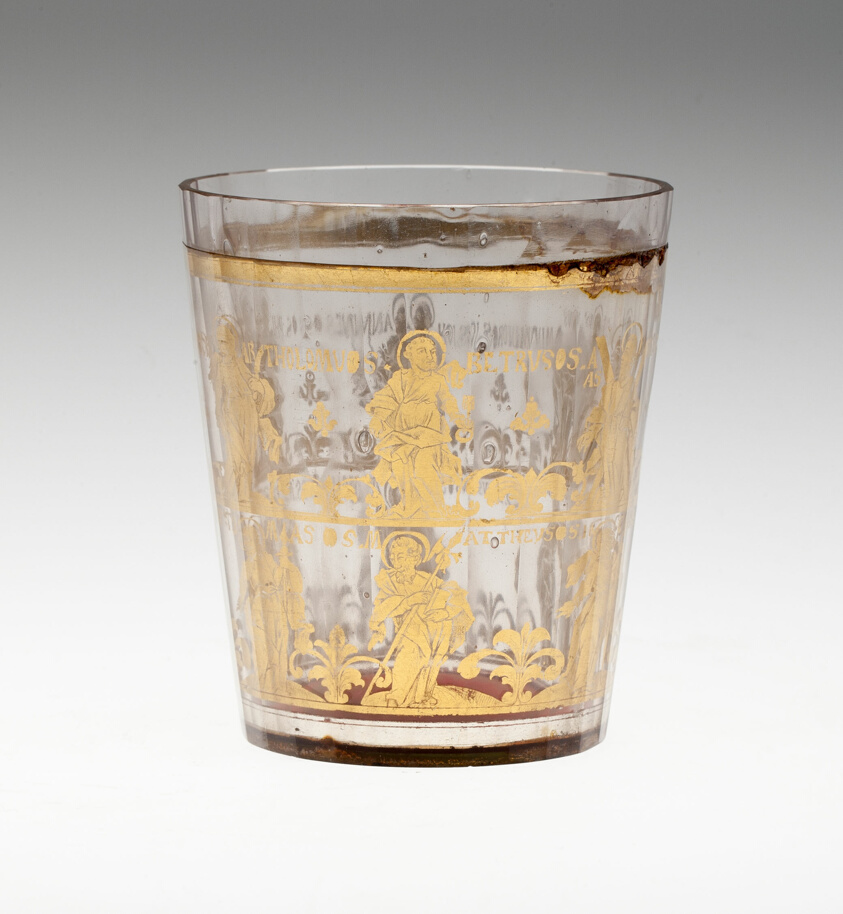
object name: Glass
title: Beaker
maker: Bohemia, Czech Republic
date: c. 1730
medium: Glass with engraved gold leaf decoration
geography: Bohemia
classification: drinking vessel; glass; european decorative arts